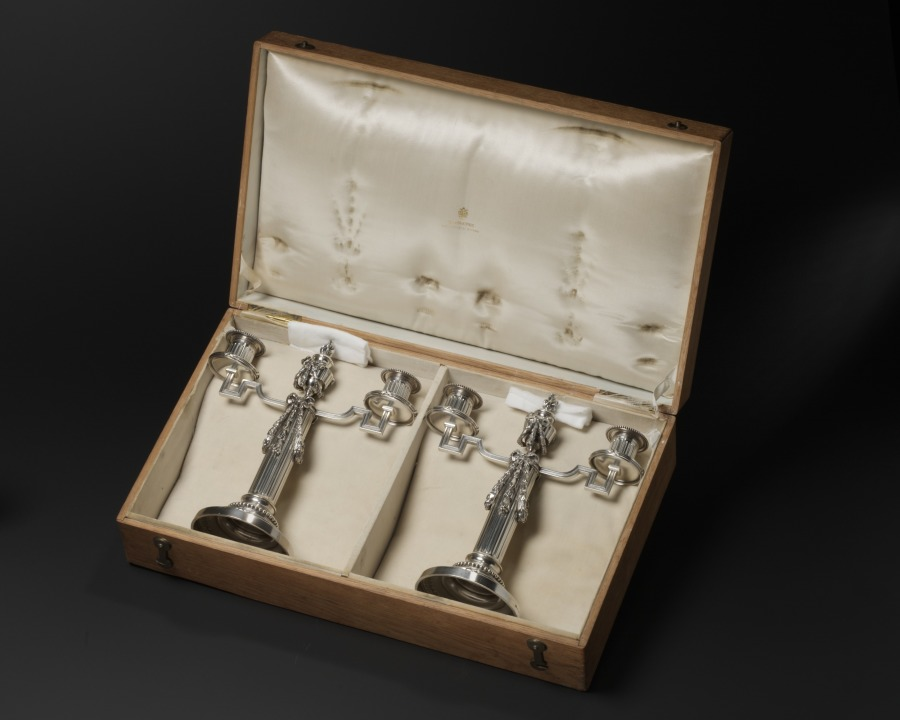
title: Pair of Candelabra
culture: Russia, St. Petersburg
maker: House of Fabergé (Russian, 1842–1918)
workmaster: Julius Alexandrovitch Rappoport (Russian, 1864–1916)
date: 1887–90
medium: silver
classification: Silver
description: This pair of candelabra demonstrates Fabergé’s commitment to a commercial balance between decorative and functional design. The pair was made by Fabergé’s chief silversmith, German-born Julius Rappoport, in Moscow, where the majority of gold and silver objects were crafted. Small in size, the pair may have been used in more intimate settings, as opposed to larger banquets or public gathering areas.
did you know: The design reflects the resurgence of the neoclassical style in the late 1800s.